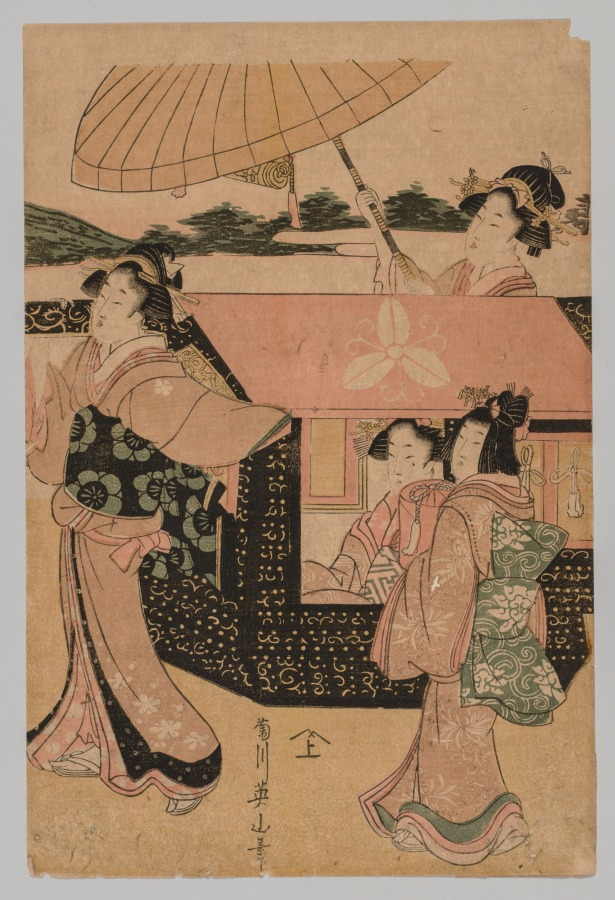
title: No Title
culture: Japan, Edo period (1615–1868)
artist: Kikukawa Eizan (Japanese, 1787–1867)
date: 1787–1869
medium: color woodblock print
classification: Print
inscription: Signature: Kikugawa Yeizan fude